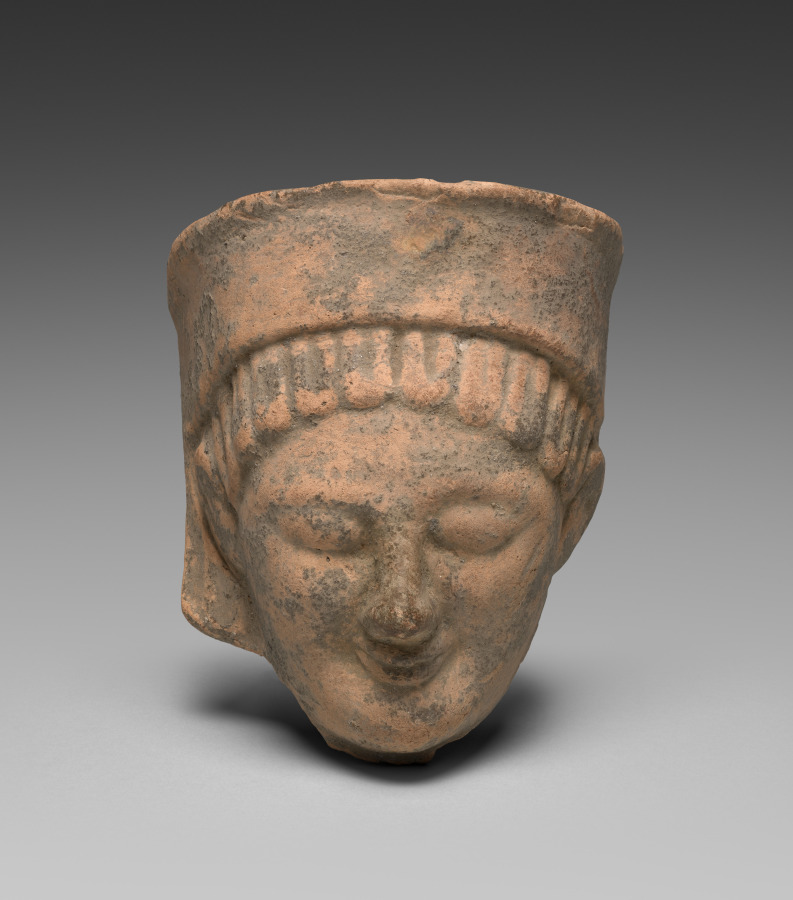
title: Mask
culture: Greece, Sicily, Selinus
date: 550 BCE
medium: terracotta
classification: Sculpture